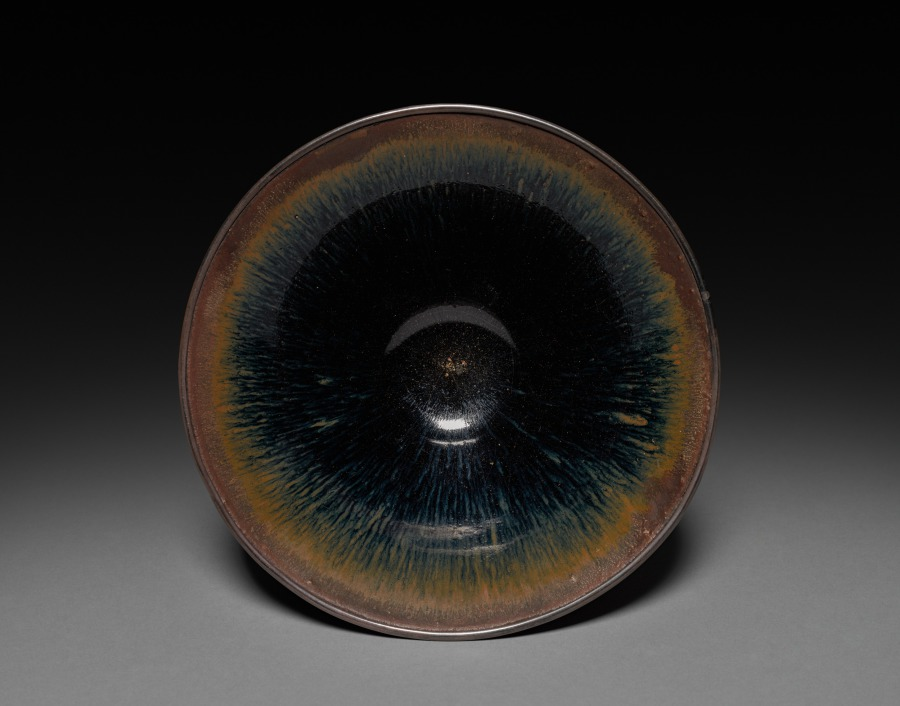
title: Tea Bowl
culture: China, Fujian province, Song dynasty (960-1279)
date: 960– 1279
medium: brown stoneware with iron slip glaze, Jian ware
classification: Ceramic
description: This tea bowl's coarse brown stoneware body was first covered with a thick, blue-black glaze. It was mottled with reddish-brown slip, whose pattern of streaks and spots are affectionately termed "hare's fur" among connoisseurs.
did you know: Jian ware was very popular with the tea cultures in China and Japan.